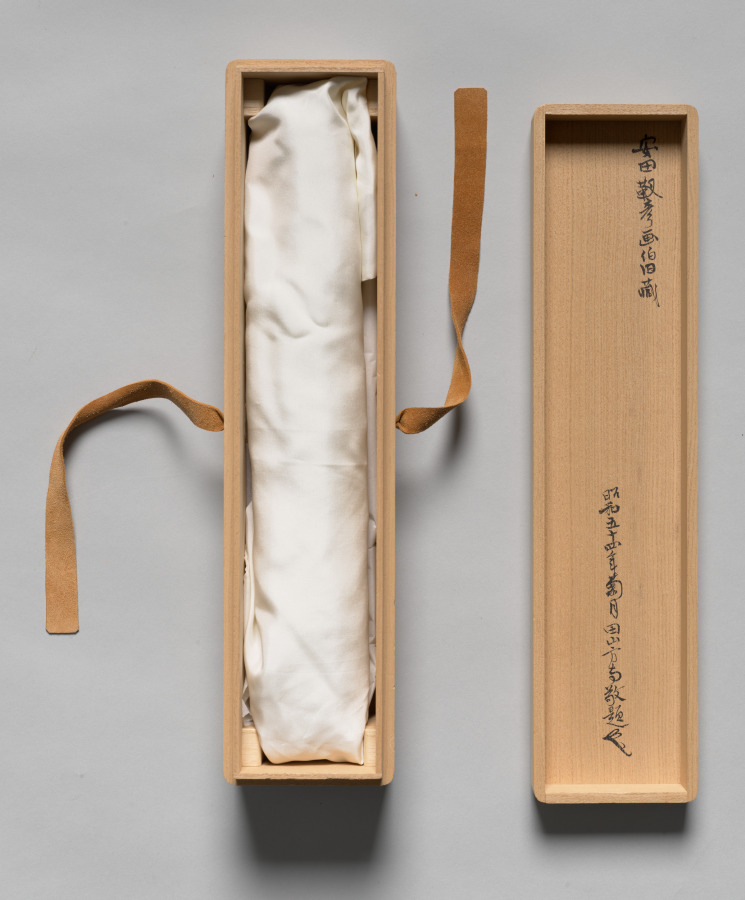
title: Single-column Calligraphy (Bright Moon and Fresh Breath as One . . . )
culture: Japan, Muromachi period (1392–1573)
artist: Motsurin Jōtō (Japanese, d. 1492)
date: 1400s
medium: hanging scroll; ink on paper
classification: Calligraphy